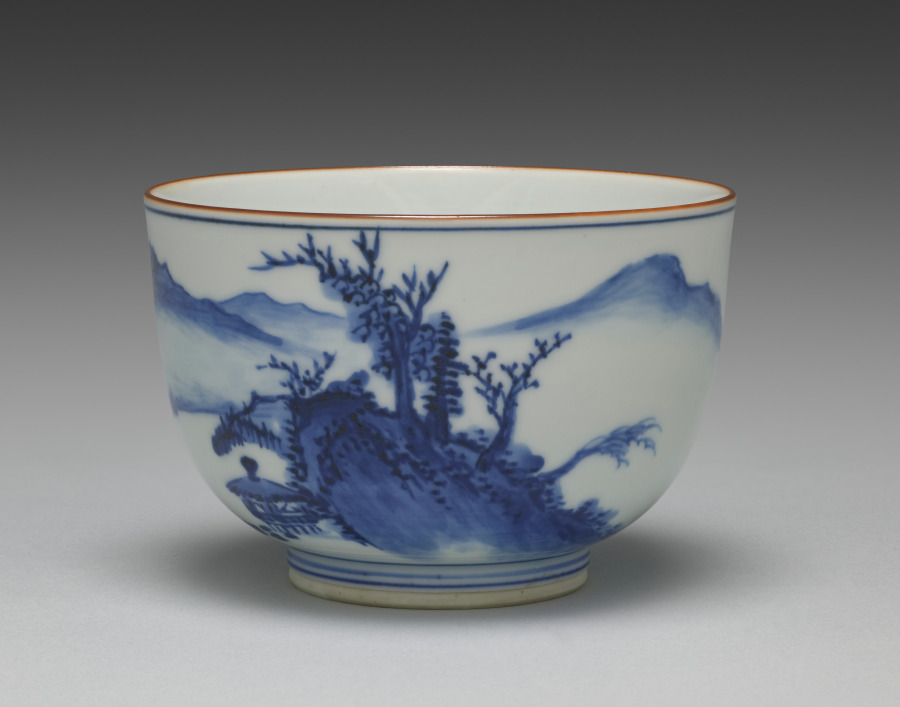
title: Bowl with Chinese Landscape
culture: Japan, Meiji period (1868–1912)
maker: Seifū Yohei III (Japanese, 1851–1914)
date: 1893–1914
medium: porcelain with underglaze blue and overglaze red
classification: Ceramic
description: This bowl has a landscape with figures in blue and iron oxide. The scene is set along a river with mountains in the distance, likely in the Jiangnan region of southern China, famous for compositions of the Eight Views of the Xiao and Xiang Rivers and of West Lake in Hangzhou. There are two people in the foreground: one person fishes along the riverbank across from a rustic hermit’s lodge sited on stilts over the water’s edge; on the other side of the bowl, a person with a tall staff gazes at the full moon, accompanied by his servant. The foot has a double band in blue, while another blue band encircles the bowl just beneath the rim, which is covered in red iron oxide. The inside of the footring is also circled in blue around the impressed mark.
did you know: The flock of geese making its way across the sky and the many bare tree branches suggest the season may be autumn.